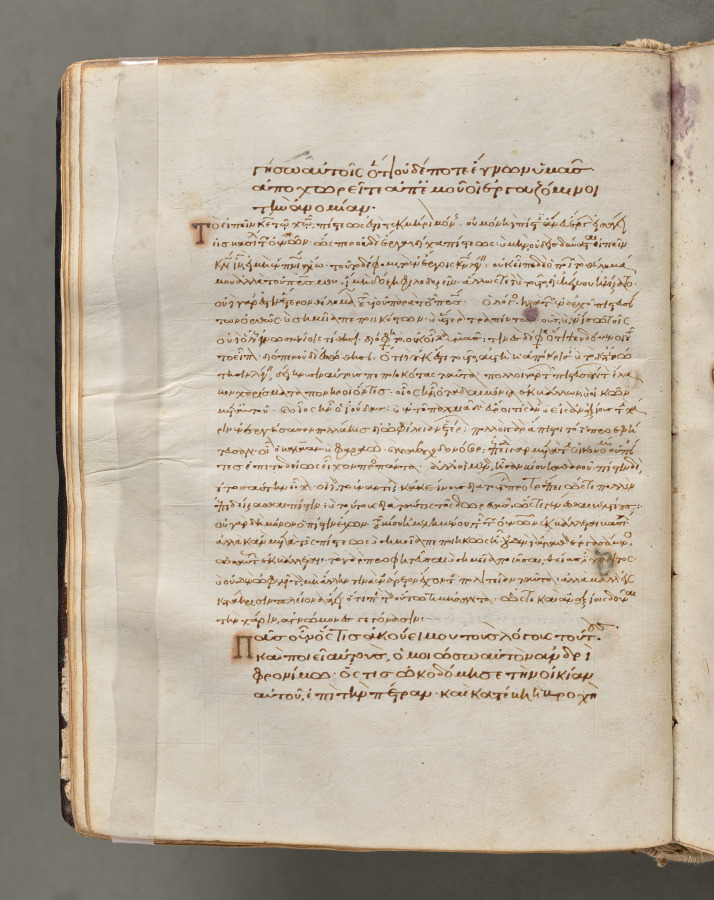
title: Text, folio 31 (verso), from a Gospel Book with Commentaries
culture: Byzantium, Constantinople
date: c. 1000–1100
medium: ink, tempera, and gold on vellum; leather binding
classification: Bound Volume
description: Each of the four gospels in this book opens on a page with brilliantly illuminated borders depicting the author of the text as well as birds—principally peacocks, symbols of the immortality of the soul—and fountains, representing the fountain of life and the salvation of the soul. This volume consists of 428 leaves with texts in Greek. Its level of sophistication suggests that it was probably written and decorated in a monastery in Constantinople.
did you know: Gospel Books were carried in procession through Byzantine churches.